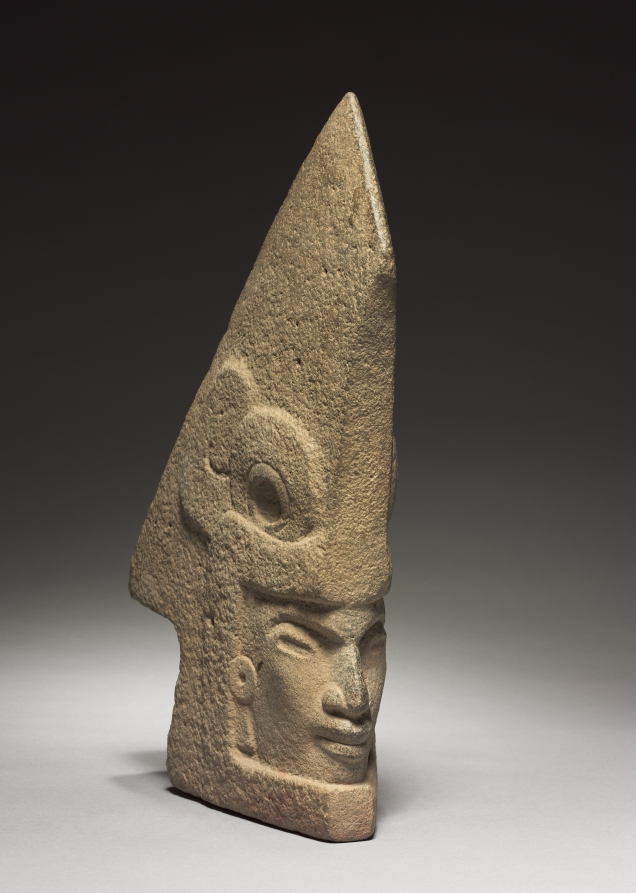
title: Hacha with Human Face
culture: Mexico, Veracruz, San Andres Tuxtla, late Classic period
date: 600–1000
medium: gray volcanic stone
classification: Sculpture